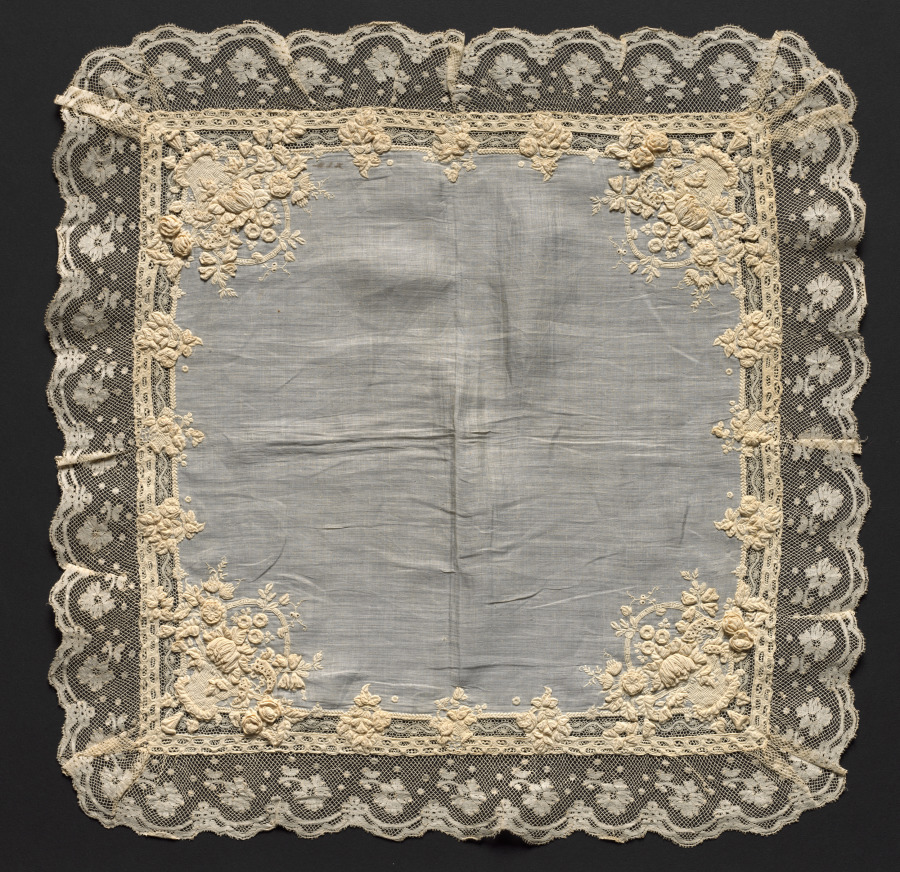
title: Lace Handkerchief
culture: Switzerland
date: 1860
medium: Plain weave linen center with bobbin lace (Valenciennes) edging and insertion and embroidery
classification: Embroidery